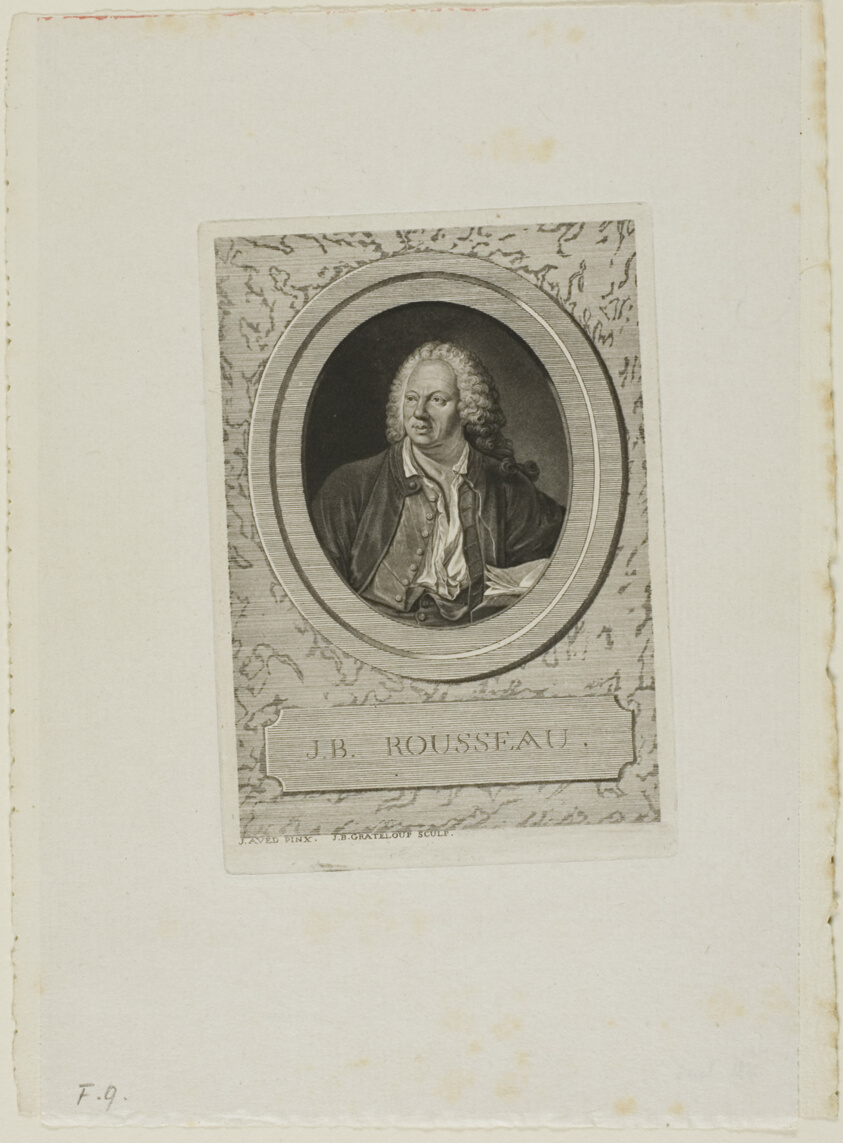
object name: Print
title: J-B. Rousseau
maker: Jean-Baptiste de Grateloup (French, 1735-1817)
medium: Aquatint on paper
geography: France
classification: aquatint; print; prints and drawing